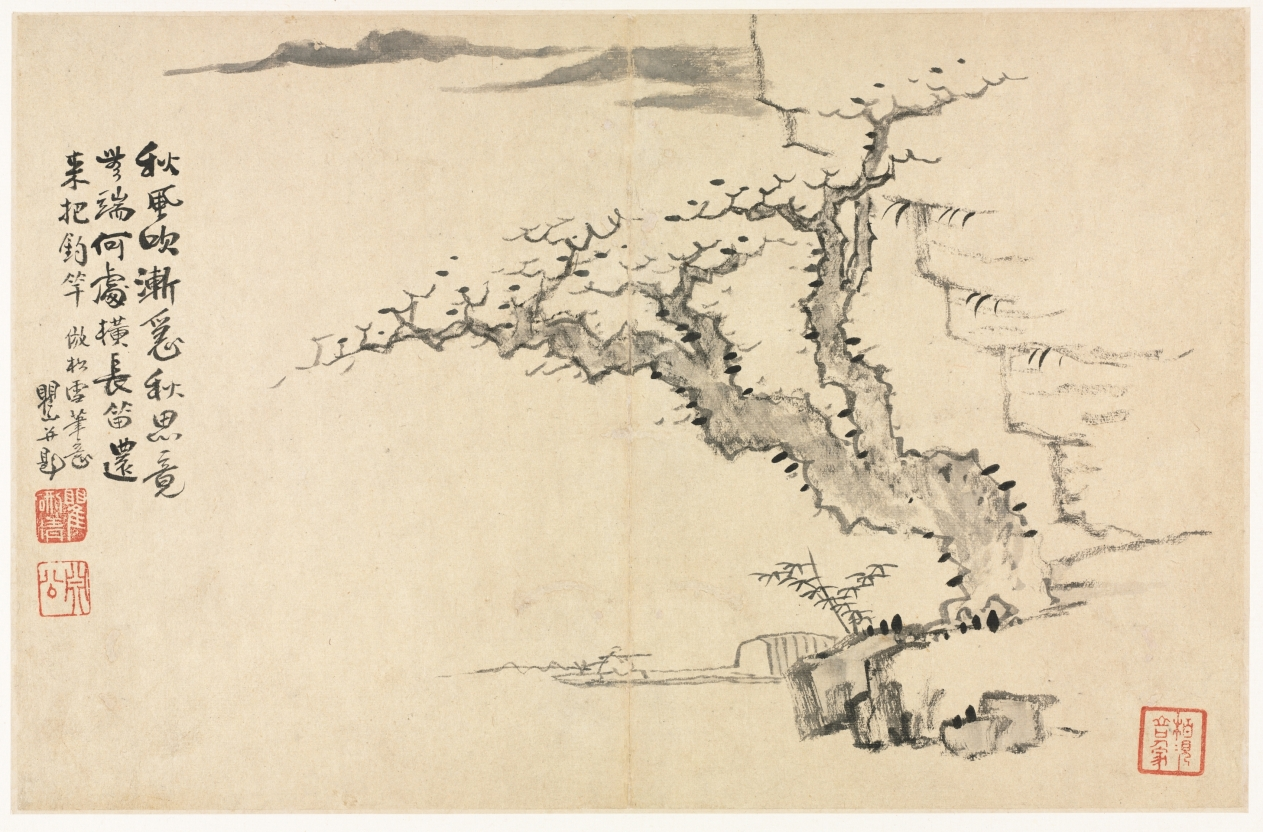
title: Landscapes in Various Styles after Old Masters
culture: China, Qing dynasty (1644-1911)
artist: Mei Qing (Chinese, 1623–1697)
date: 1690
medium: album leaf: ink and color on paper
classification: Painting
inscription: Artist's inscriptions, signatures, and 35 seals: F. The blowing of the fall wind decreases gradually, Melancholy thoughts of autumn are, in the end, inexplicable. Where do I play my long flute [and] at the same time hold a fishing pole? Imitating Sung-hsüeh's [Chao Meng-fu] brush idea. Ch'ü-shan [painted] and inscribed [2 seals] Ch'ü-hsing, Ch'ing; Yüan-kung. [seal, lower right corner] Po-chien shan-k'ou jen-chia.